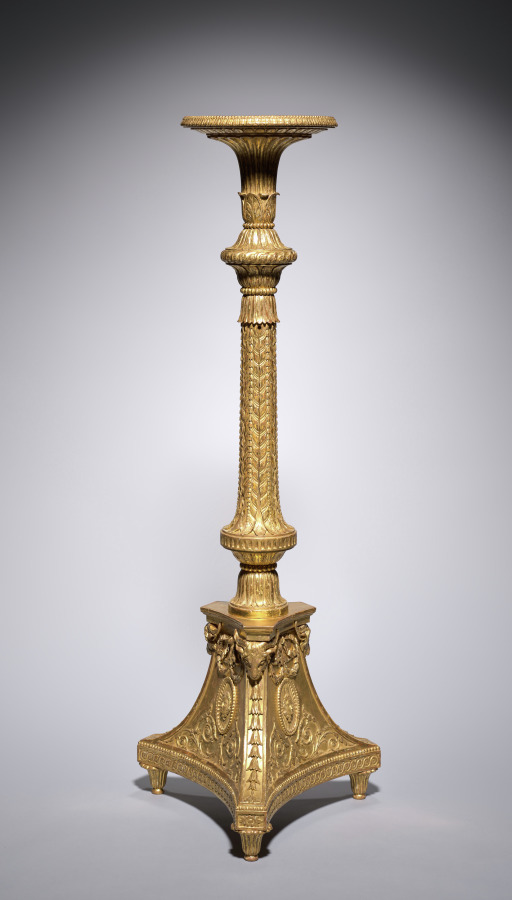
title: Candle Stand (torchère) (2 of 2)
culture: England, 18th century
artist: Thomas Chippendale (British, 1718–1779)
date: c. 1773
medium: Gilt-wood, gesso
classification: Furniture and woodwork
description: This gilded candle stand was made by Thomas Chippendale, the most renowned cabinetmaker in eighteenth-century London, for the grand drawing room of Brocket Hall, a large country house in Hertfordshire, England. With finely carved acanthus leaves, swags, fluting, and oval masks depicting the Roman goddess Diana, this candle stand exhibits Chippendale’s masterful understanding of neoclassical proportion, scale, and ornament. His landmark book of furniture designs, The Gentleman and Cabinet-Maker’s Director (first published in 1754), was highly admired as a source of inspiration by cabinetmakers and architects around England as well as in Europe and America.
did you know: Candle stands usually held silver or crystal candelabra that were lit for evening entertainment.